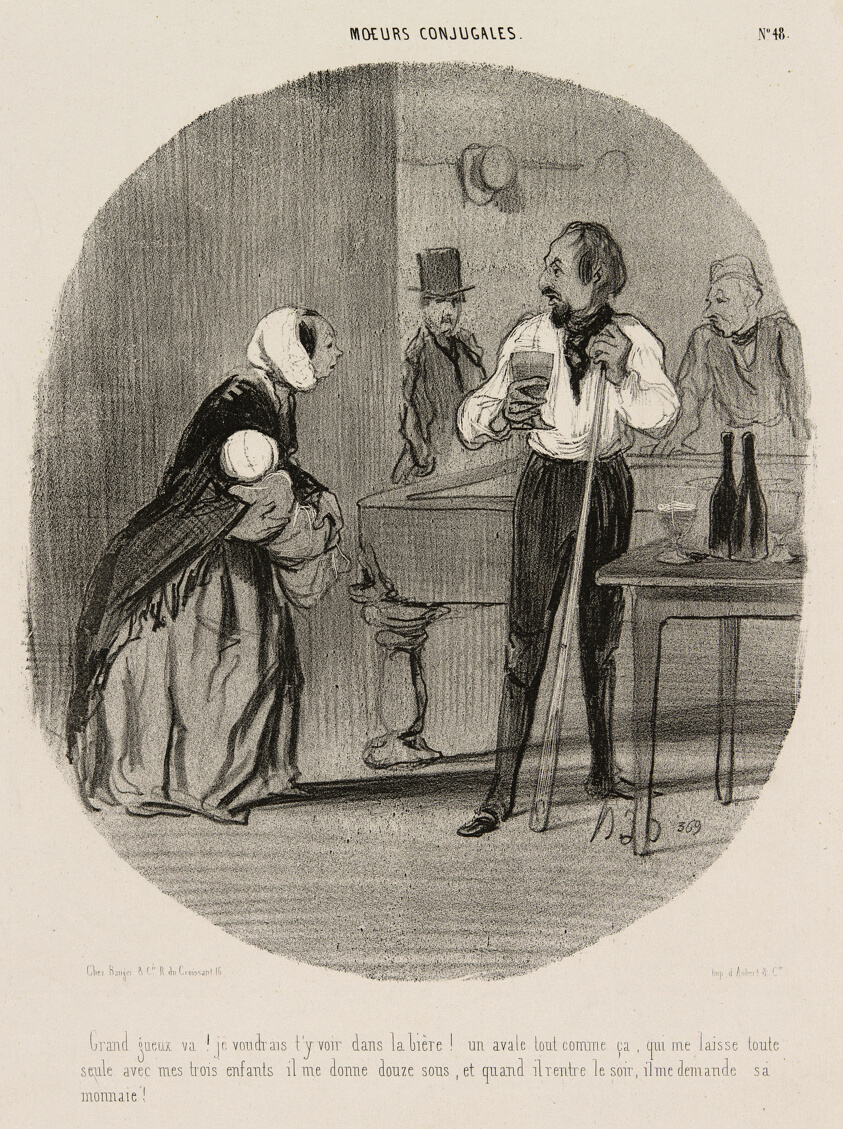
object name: Print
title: “You tramp! I would like to see you drown in your beer! Leaving me alone like that with my three children, he gives me twelve sous, and when he comes back in the evening, he asks for his change!,” plate 48 from Moeurs Conjugales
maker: Honoré Victorin Daumier; French, 1808-1879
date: 1842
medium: Lithograph in black on off-white wove paper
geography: France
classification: lithograph; print; prints and drawing